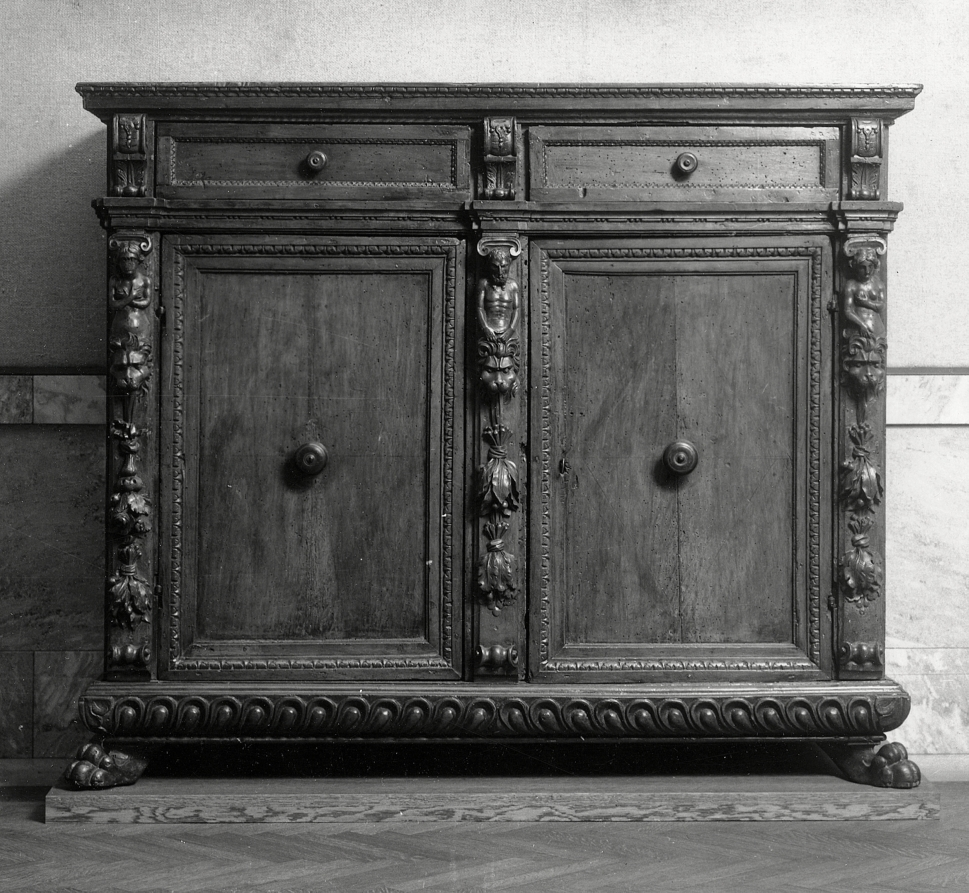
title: Credenza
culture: Italy, 16th century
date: 1550–1599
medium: walnut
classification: Furniture and woodwork